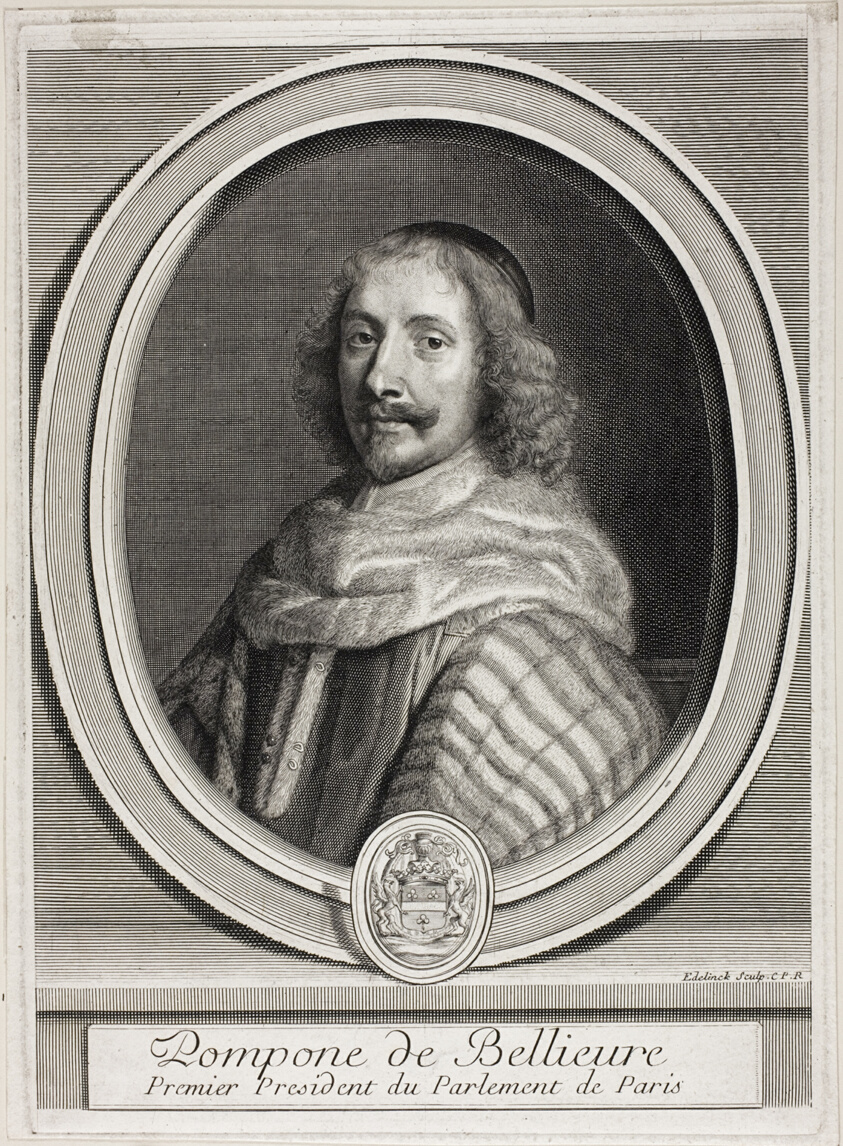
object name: Print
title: Pompone de Bellièvre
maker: Gérard Edelinck (French, born Flanders, 1640-1707)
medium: Engraving on paper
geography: France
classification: etching; print; prints and drawing